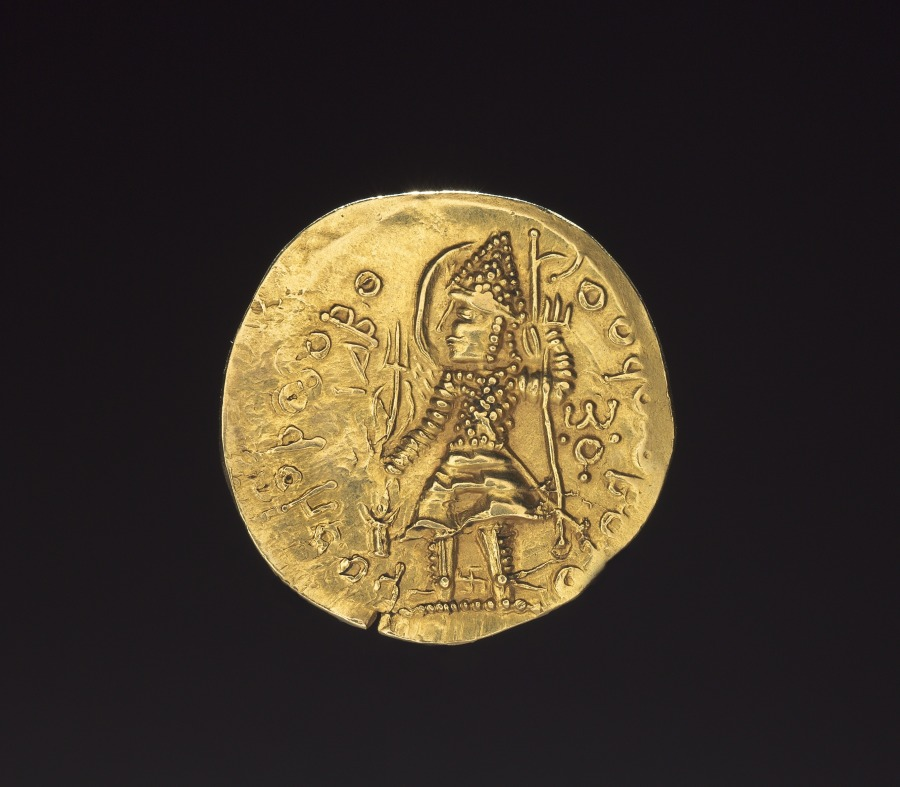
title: Coin of Kushan King Vasudeva II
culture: India, Kushan, Vasudeva II (c. 275–300 CE)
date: 200s CE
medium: gold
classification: Coins